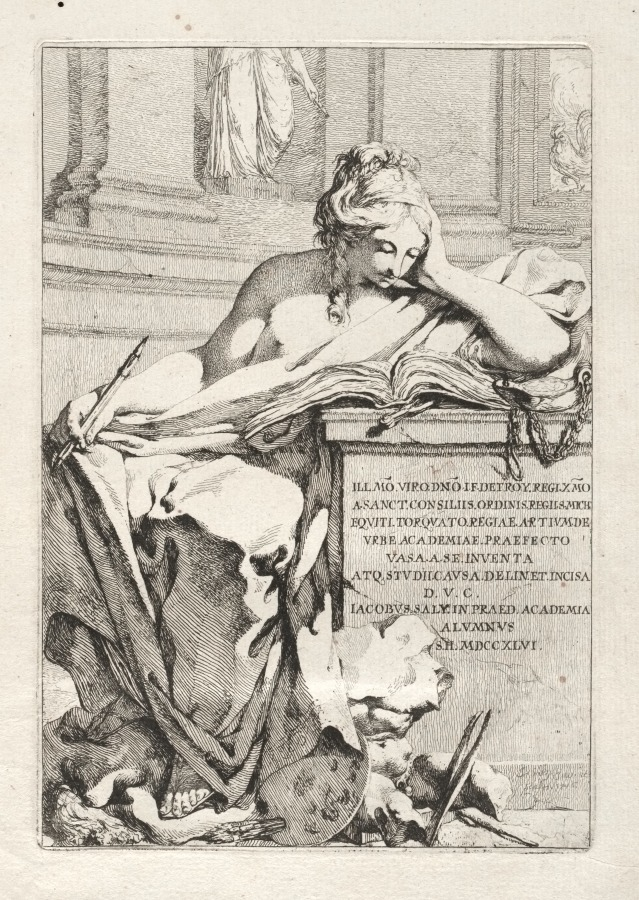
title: Suite of Vases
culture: France, 18th century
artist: Jacques François Saly (French, 1717–1776)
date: 1746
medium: etching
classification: Print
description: Trained as a sculptor, Saly etched a series of 30 vase designs while studying at the Académie de France in Rome. Designing ornamental vases or urns was particularly popular during the mid-18th century, as the motif allowed artists the opportunity to demonstrate their skill and imagination. In these vases, Saly inventively incorporated animals, mythical creatures, faces, and grotesques. After his return to Paris, the publication announcement for the Suite of Vases endorsed the etchings as an indication of the sculptor’s ingenuity and freedom of design. The vase designs also nourished an appetite for the revival of classical elements, or Neoclassicism, in decorative arts that developed in the mid-18th century.